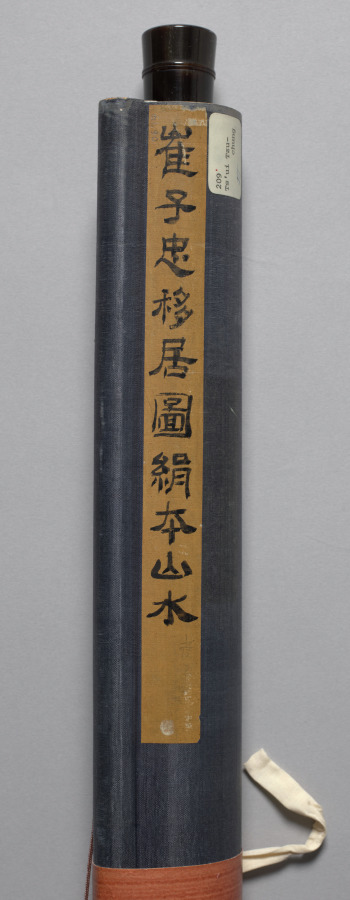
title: Xu Jingyang Moving His Family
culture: China, Ming dynasty (1368–1644)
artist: Cui Zizhong (Chinese, 1574–1644)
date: 1644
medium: Hanging scroll; ink and color on silk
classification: Painting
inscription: Artist's 2 seals: Pei-hai, Cui Zizhong yin.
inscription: 9 additional seals: 2 of Xiang Yuan (18th-19th c.); 1 of Tang Zuomei (late 18th-19th c.); 1 of Zhang Heng 張珩 (1915-1963); 1 of C. C. Wang 王季遷 (1907–2003); 4 unidentified.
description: Xu Jingyang was a dedicated fourth-century Confucian official who allegedly turned into a Daoist immortal. This scroll depicts the legend that when he attained immortality, he took his entire household, including chickens and dogs, to paradise. Cui Zizhong’s painting style intentionally referenced ancient masters. Typical of the pre-Song dynasty landscape tradition, there is the use of blue and green colors and an emphasis on outline rather than texture. While the trembling outlines are reminiscent of earlier painters, the flickering light on rocks and trees is a stylistic feature of Cui’s own time.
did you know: Xu Jingyang, wearing red, is in the upper register of figures, while below his servants transport a rooster, dog, and other supplies.